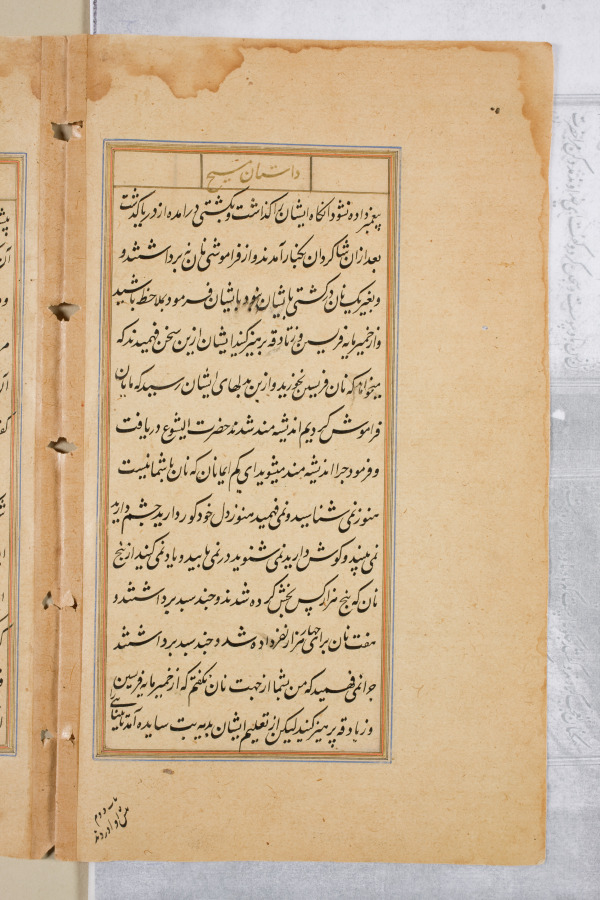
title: Text page from a Mirror of Holiness (Mir’at al-quds) of Father Jerome Xavier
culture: Mughal India, Allahabad, made for Prince Salim (1569–1627)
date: 1602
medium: Ink and gold on paper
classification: Manuscript